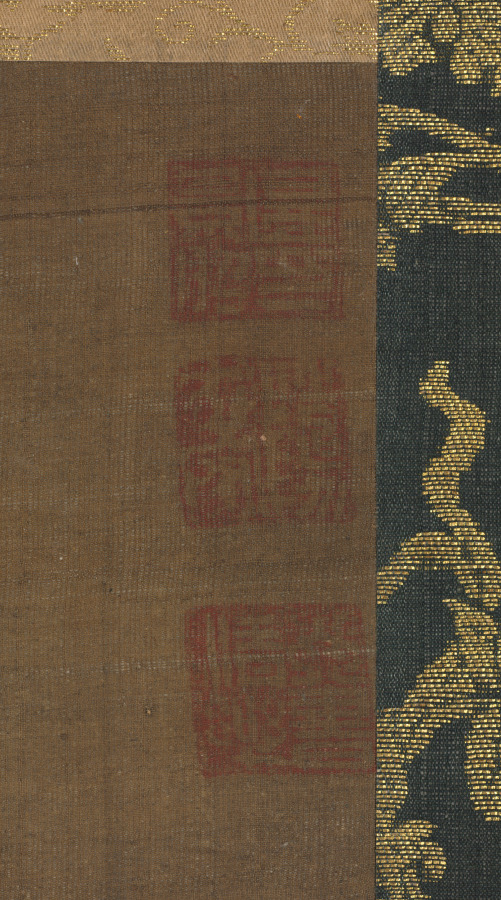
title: A Hundred Birds and the Three Friends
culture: China, Ming dynasty (1368–1644)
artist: Bian Wenjin (Chinese, about 1354–1428)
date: 1400–1425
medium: hanging scroll; ink and color on silk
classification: Painting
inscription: Artist's three seals: Pien yin Ching-chao; Sha-yang shih-chia; Ch'in shu ch'ing-lo.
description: In this hanging scroll birds rest and frolic among pines, bamboo, and flowering plum, plants known as “the three friends.” Due to their endurance in winter, they symbolize perseverance and friendship in adverse times. The naturalistic depiction of the birds refers to the bird-and-flower painting tradition of the Art Academy of the Song dynasty. The painter Bian Wenjin served at the court of the Ming dynasty Yongle Emperor (reigned 1402–24). This painting may have been hung in a private studio or palace hall on appropriate occasions.